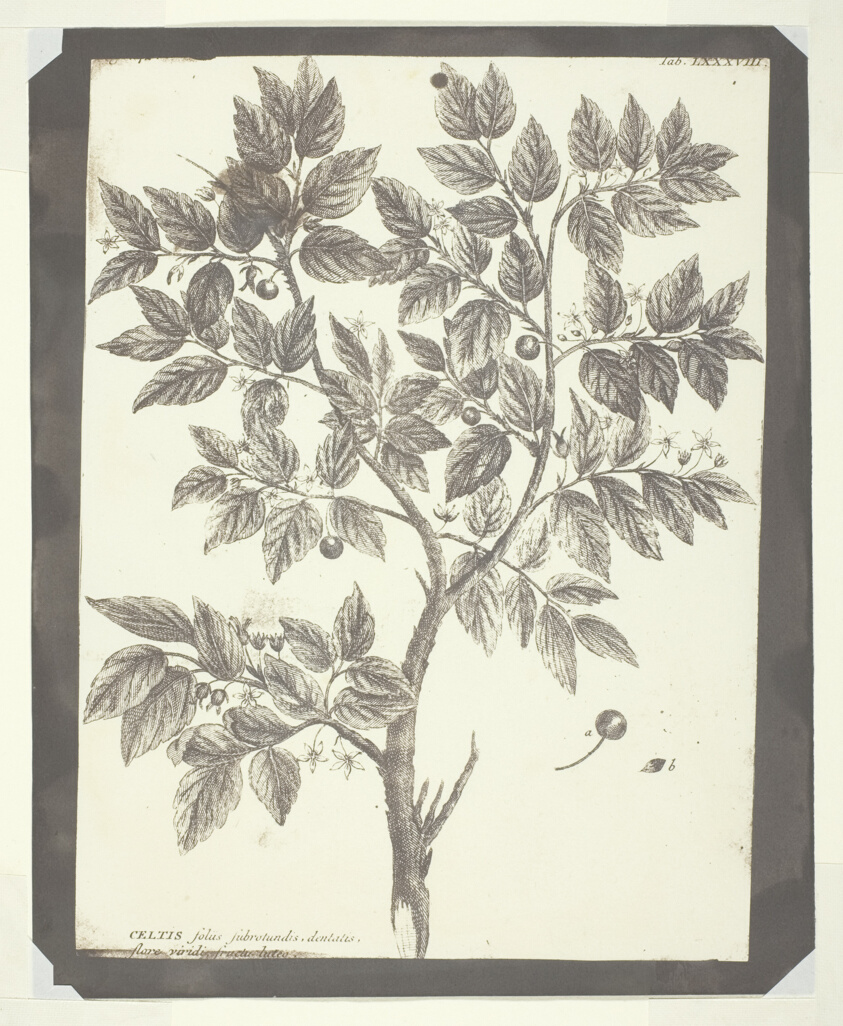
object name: Photograph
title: Copy of Botanical Engraving of "Celtis"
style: 19th century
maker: William Henry Fox Talbot (English, 1800–1877)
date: 1840/45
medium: Salted paper print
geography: England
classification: salted paper print; photographic process; photography; photograph